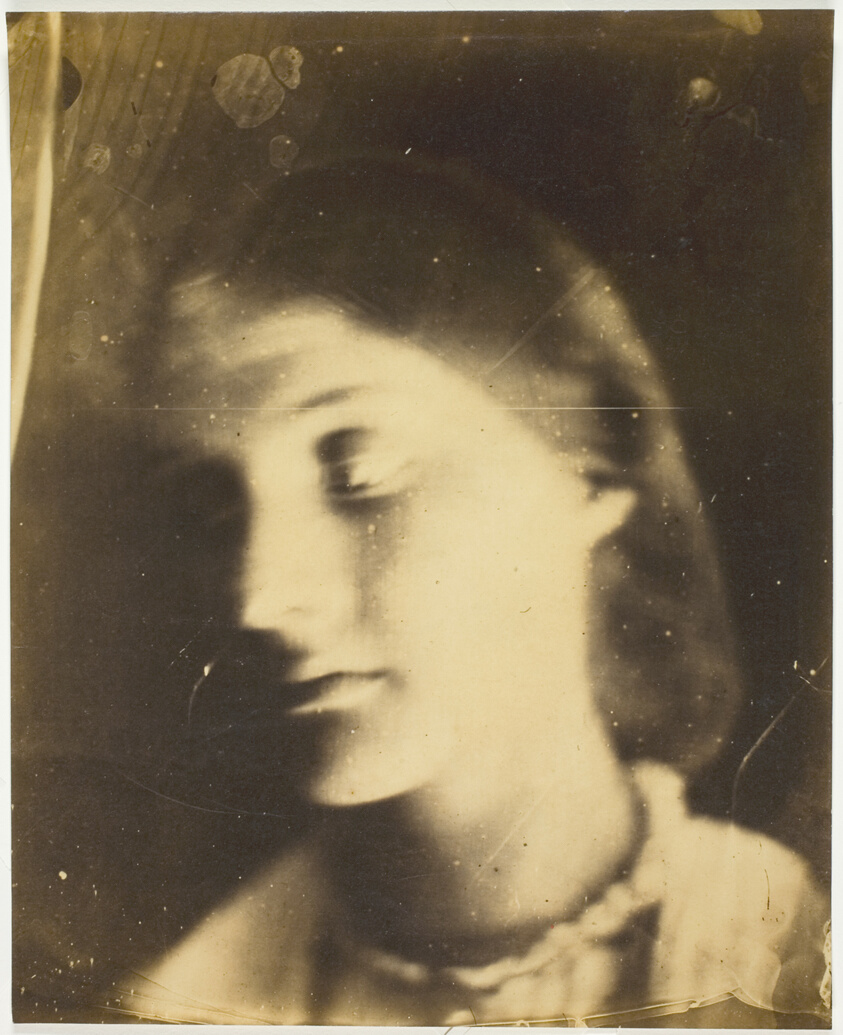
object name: Photograph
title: Julia Jackson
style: 19th century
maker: Julia Margaret Cameron (English, 1815–1879)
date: 1864/65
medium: Albumen print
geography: England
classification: albumen silver print; photographic process; photography; photograph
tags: portraits, portraits: female subject, photography